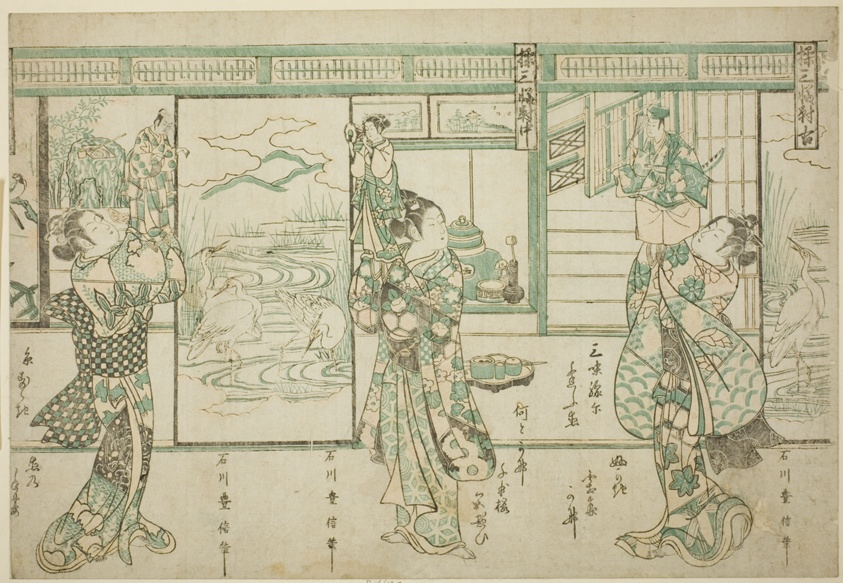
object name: Print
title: Puppeteers - A Set of Three (Ayatsuri sanpukutsui)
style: Japanese (culture or style)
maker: Ishikawa Toyonobu (Japanese, 1711-1785)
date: c. 1752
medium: Color woodblock print; uncut hosoban triptych, benizuri-e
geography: Japan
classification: woodblock print; print; asian art